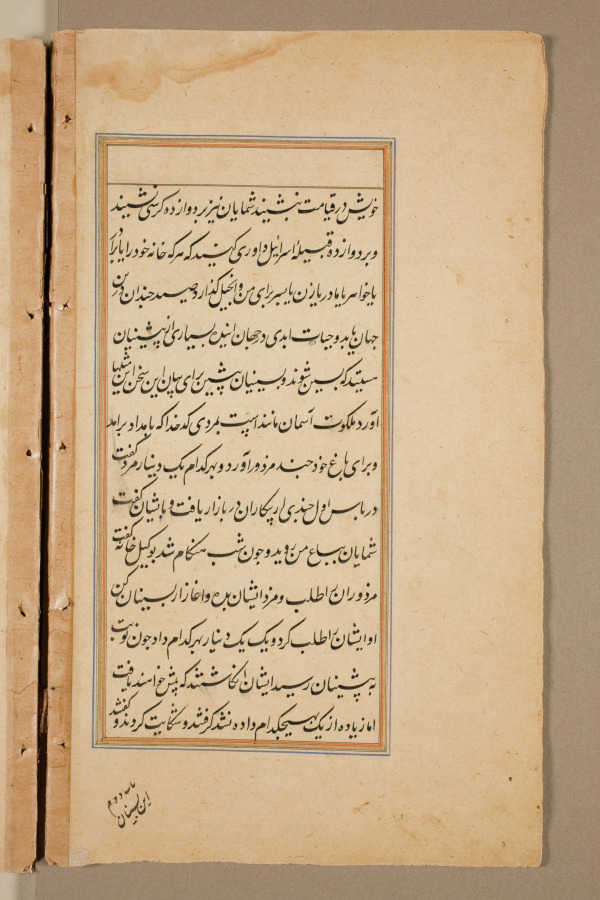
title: Text page from a Mirror of Holiness (Mir’at al-quds) of Father Jerome Xavier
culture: Mughal India, Allahabad, made for Prince Salim (1569–1627)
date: 1602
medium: Ink and gold on paper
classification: Manuscript